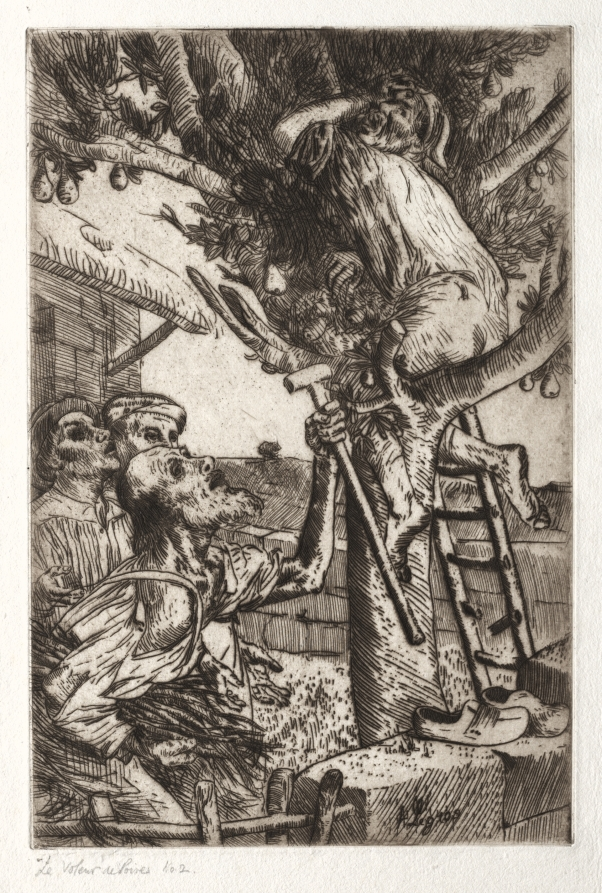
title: The Pear Thief, No. 1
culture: France, 19th century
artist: Alphonse Legros (French, 1837–1911)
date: c. 1890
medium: etching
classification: Print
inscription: lower right, in graphite: Le Voleur de Poires No. 2